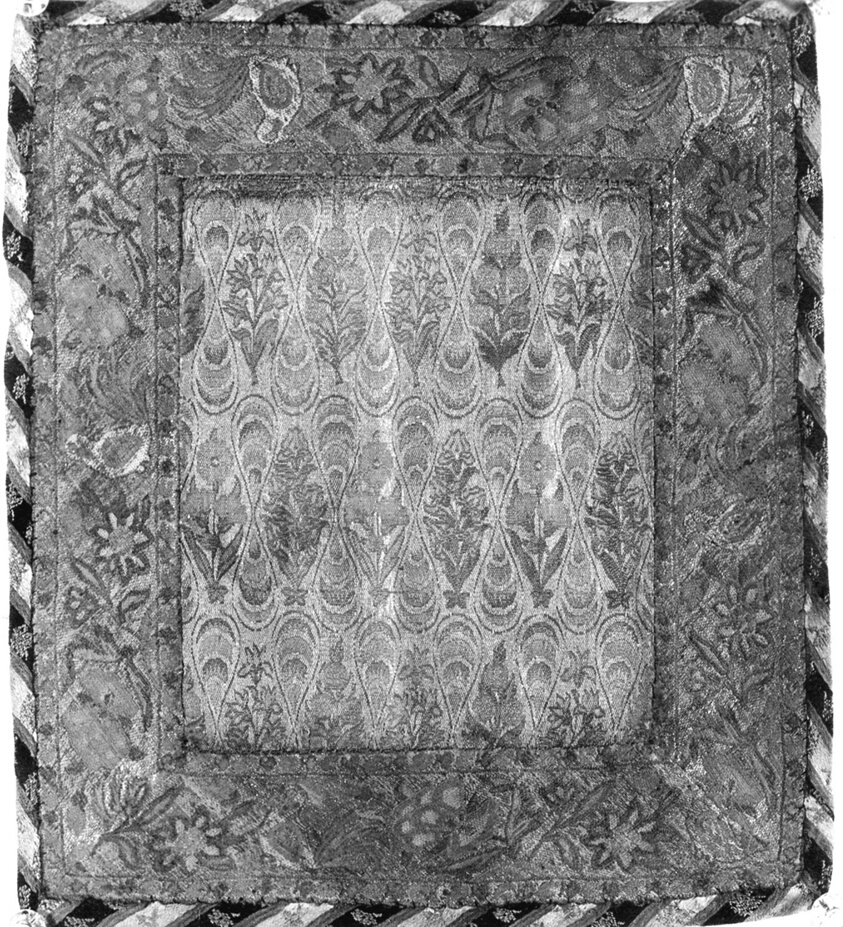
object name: Textile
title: Cover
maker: Iran (Persia)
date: 18th century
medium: Plain compound cloth, silk and gold wound on yellow silk core, filled with diagonally woven border of compound cloth, silk, gold wound on yellow silk core, and silver wound on white silk core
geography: Iran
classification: textile; weaving